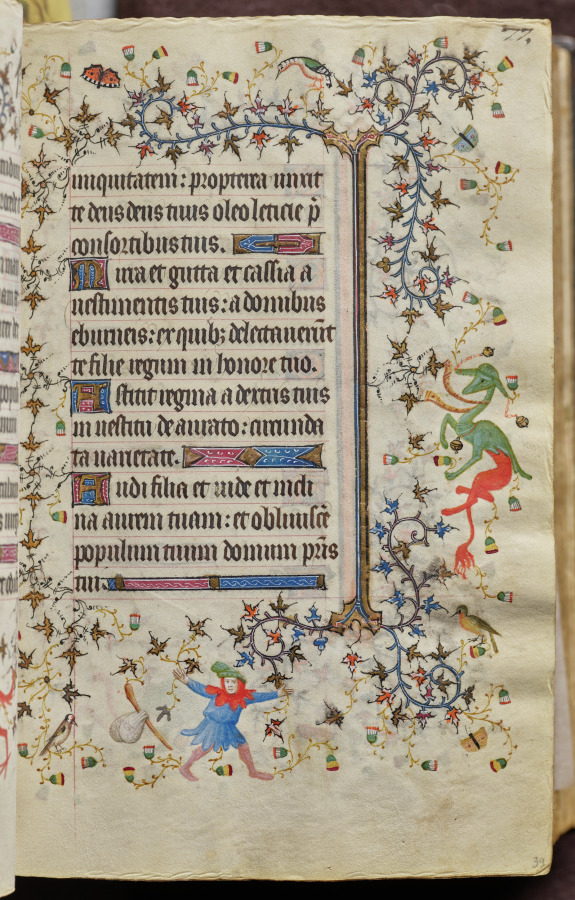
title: Hours of Charles the Noble, King of Navarre (1361-1425): Fol. 39r, Text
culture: France, Paris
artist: Master of the Brussels Initials and Associates (French)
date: c. 1405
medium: ink, tempera, and gold on vellum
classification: Bound Volume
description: This precious book was highly prized by its owner, Charles III, King of Navarre, a French-born prince whose coat of arms is painted on 20 folios. Charles visited Paris on numerous occasions and likely acquired this volume there in 1404. Paris was the center of the European book trade at the time and attracted illuminators from many parts of Europe. This manuscript represents one of the most remarkable fusions of French and Italian taste in book illumination. Though conforming to Parisian standards, most of the book’s major miniatures are the work of the Brussels Initials Master, an Italian illuminator who previously worked in Bologna and Padua.